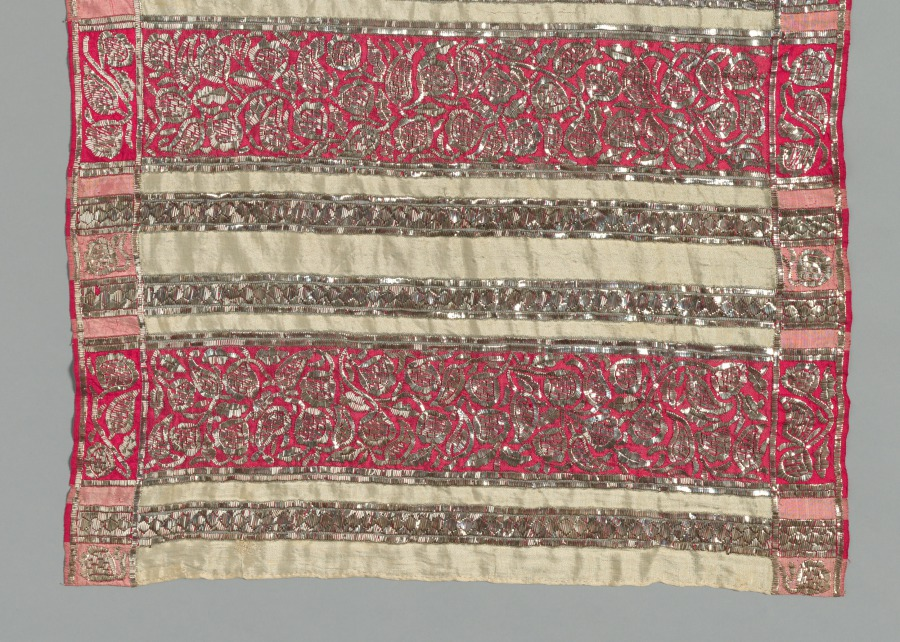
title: Scarf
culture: Africa, North Africa, Algeria, Algerian weaver and embroiderer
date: early 1900s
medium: Silk, metal strips, linen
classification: Embroidery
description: An Algerian weaver used alternating red and white silk wraps and wefts (vertical and horizontal threads) to create a checkerboard pattern of deep reds, solid white, and light pink sections on this textile. The central portion is woven of a different material, potentially linen. An embroiderer used large amounts of flat metal strips to create floral designs that shimmer brightly.